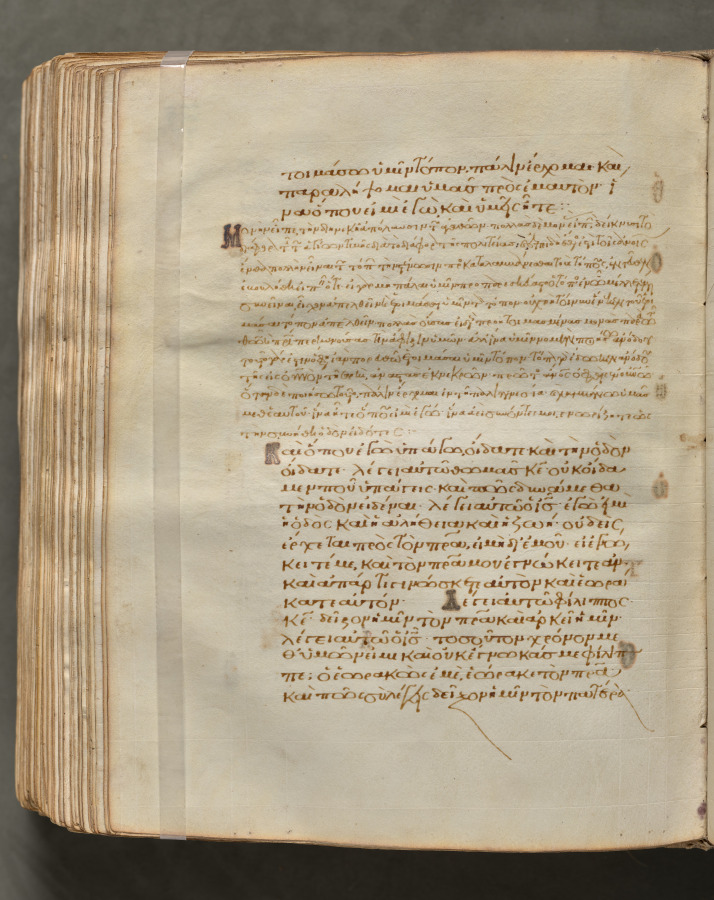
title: Text, folio 392 (verso), from a Gospel Book with Commentaries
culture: Byzantium, Constantinople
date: c. 1000–1100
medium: ink, tempera, and gold on vellum; leather binding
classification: Bound Volume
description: Each of the four gospels in this book opens on a page with brilliantly illuminated borders depicting the author of the text as well as birds—principally peacocks, symbols of the immortality of the soul—and fountains, representing the fountain of life and the salvation of the soul. This volume consists of 428 leaves with texts in Greek. Its level of sophistication suggests that it was probably written and decorated in a monastery in Constantinople.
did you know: Gospel books were carried in procession through Byzantine churches.